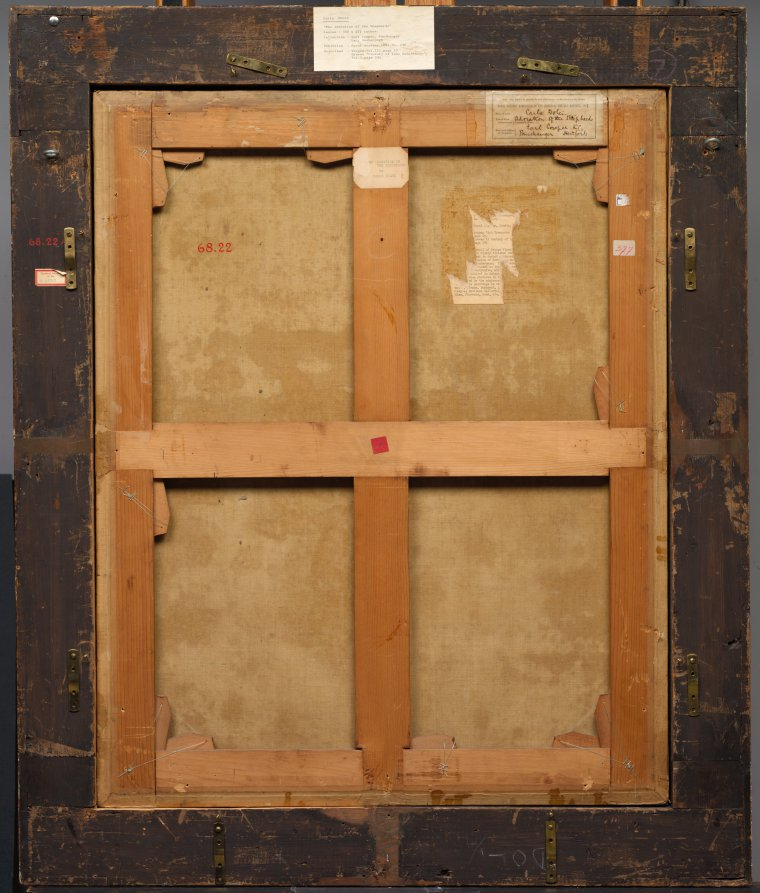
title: Adoration of the Shepherds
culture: Italy, 17th century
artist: Carlo Dolci (Italian, 1616–1687)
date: c. 1670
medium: oil on canvas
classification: Painting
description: The historical significance of the Baroque painter Carlo Dolci, a precocious artist whose skill was recognized early by the leading Florentine patrons of his time, is often diminished due to his traditionalist compositions. Having gained local reputation as a talented portraitist and painter of religious narrative, Dolci's anti-Mannerist technique dismissed many of the leading Baroque trends as superfluous, retaining an unobtrusive and placid style in the manner of those before him. Having been a devout follower of the brotherhood of St. Benedict, Dolci draws upon a strict Christian iconography in his depiction of the shepherds' witness account of the birth of Christ. --Charles Eppley (January 2009)